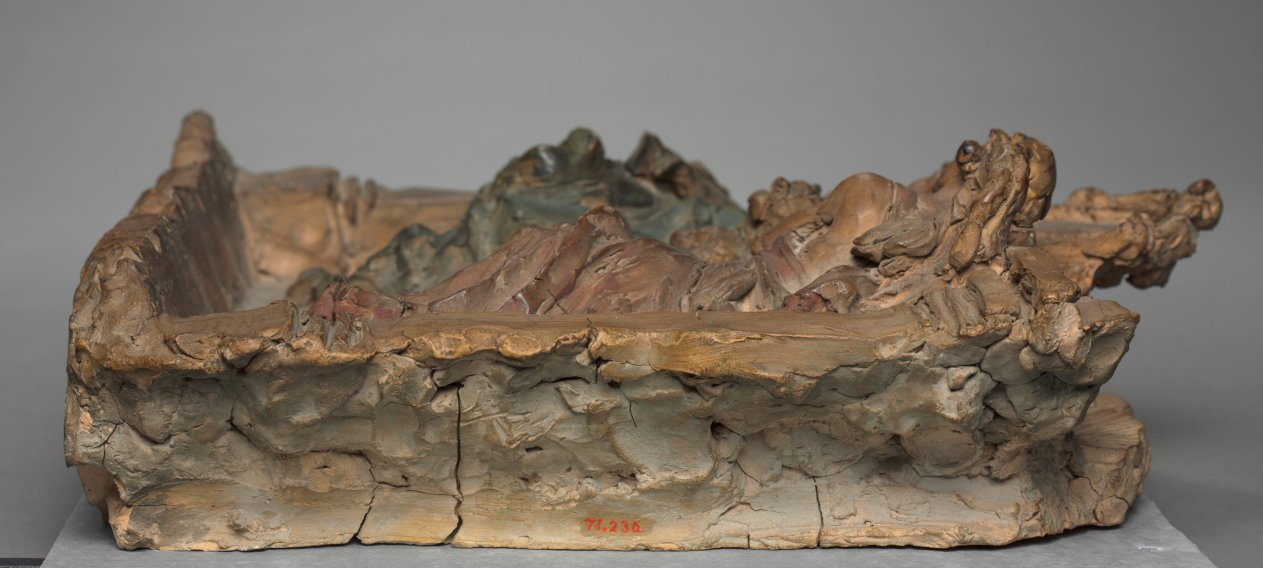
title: Two Angels and Cherubs Bearing an Icon of Christ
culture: Italy, Rome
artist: probably by Paolo Naldini (Italian, 1616–1691)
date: c. 1670–80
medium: terracotta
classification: Sculpture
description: This work is probably a study for a large altarpiece that would have combined several materials, including marble, stucco, and paint. The artist modeled his design in soft clay, which was then hardened by firing; subtle tints suggest the richness of the finished work. The idea of using sculptural figures to support a painted image within an altarpiece was influenced by the work of the Roman sculptor Gian Lorenzo Bernini (1598–1680), with whom Naldini is known to have worked.